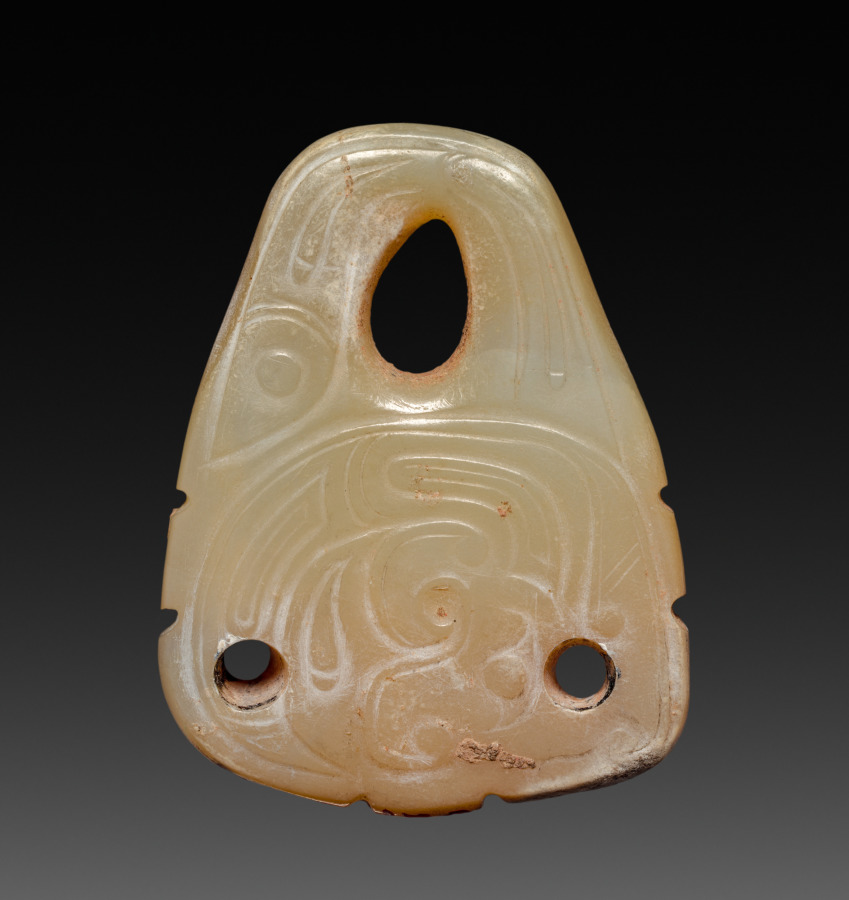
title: Pendant with Coiled Dragon and Fish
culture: China, Western Zhou dynasty (c. 1046–771 BCE)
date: 1000–900 BCE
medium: jade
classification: Jade